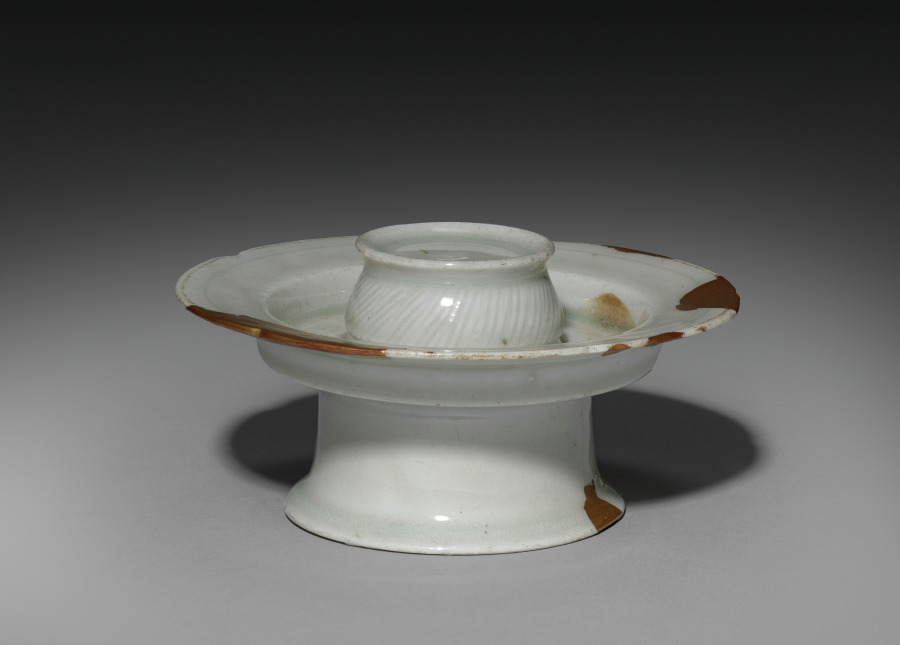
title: Cup and Stand (stand)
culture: Korea, Goryeo dynasty (918–1392)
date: 918–1392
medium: pottery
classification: Ceramic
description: As early as the seventh century, the practice of drinking tea and wine became an important part of elite culture in Korea. Elites of the Goryeo period commissioned a variety of types of utensils and vessels including this delicate-looking cup and cup stand, not only to make their drinking experience more exciting, but also to show their refined taste.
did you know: Elites of the Goryeo period are known for their love of drinking tea and wine. This type of delicate-looking stoneware was buried in the tombs of ruling elites.